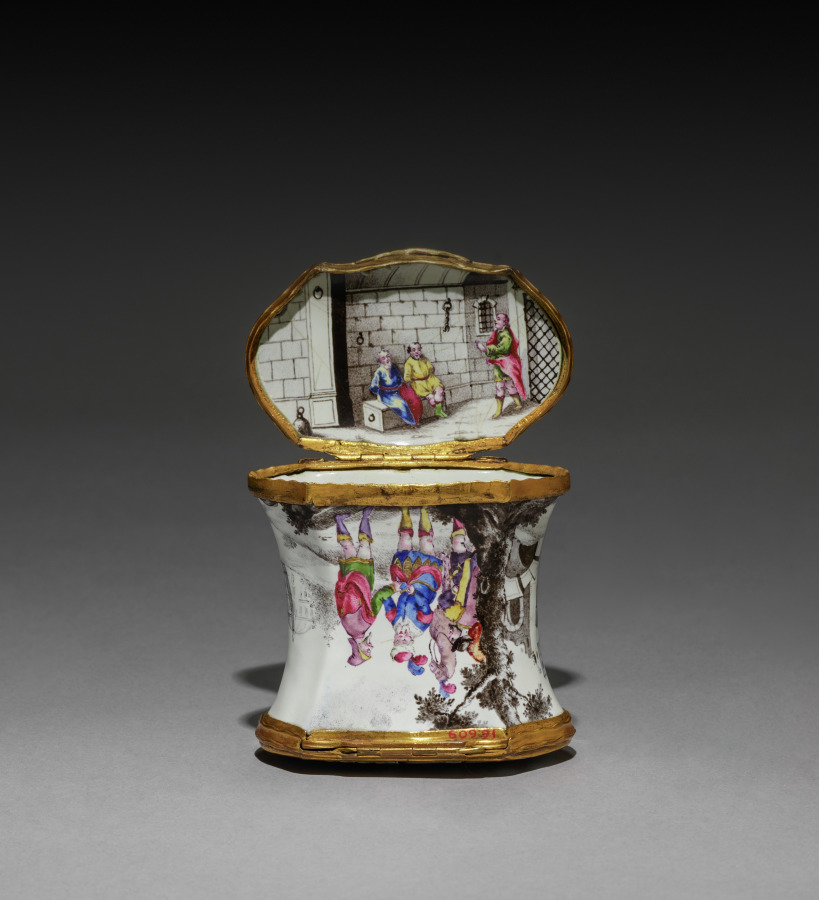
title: Box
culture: Germany, Augsburg, 18th century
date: c. 1730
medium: enamel on copper with metal mounts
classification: Miscellaneous